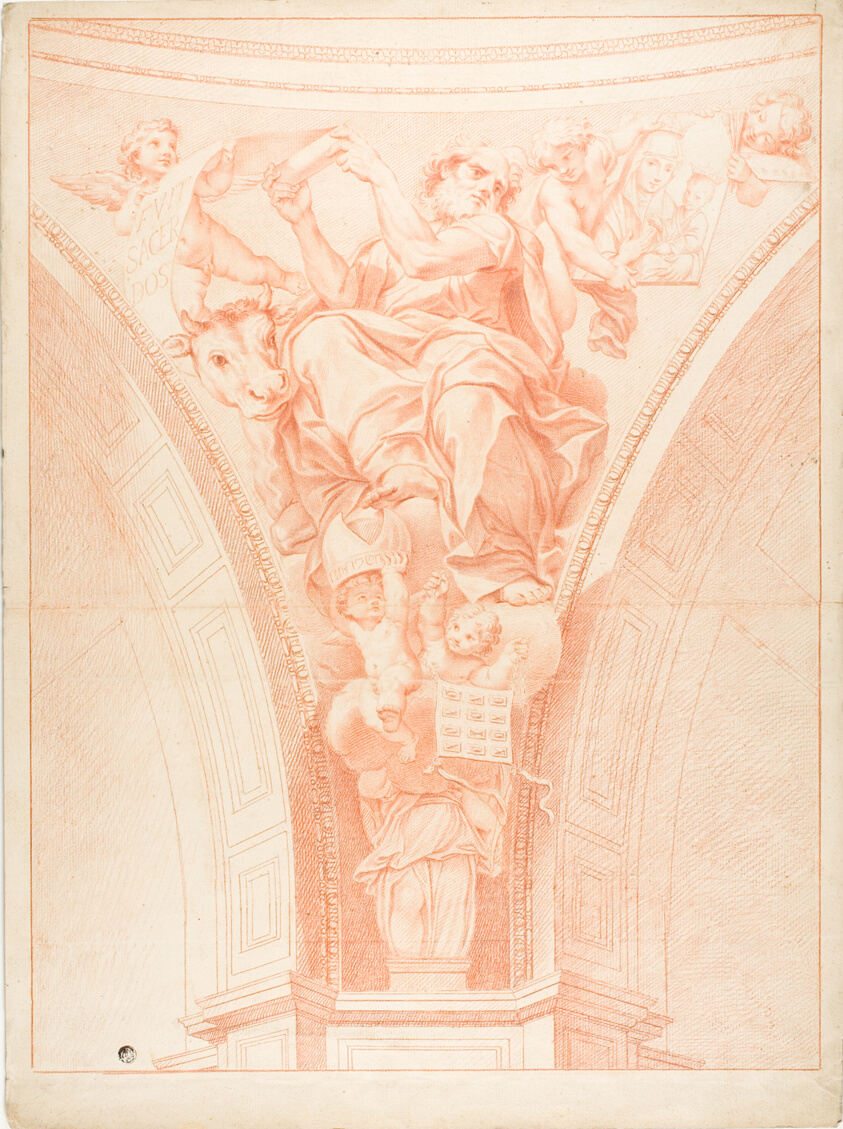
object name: Drawing and Watercolor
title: Saint Luke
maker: After Domenichino; Italian, 1581-1641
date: after 1627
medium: Red chalk on buff laid paper, laid down on cream laid paper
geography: Italy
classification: chalk; drawings (visual works); prints and drawing